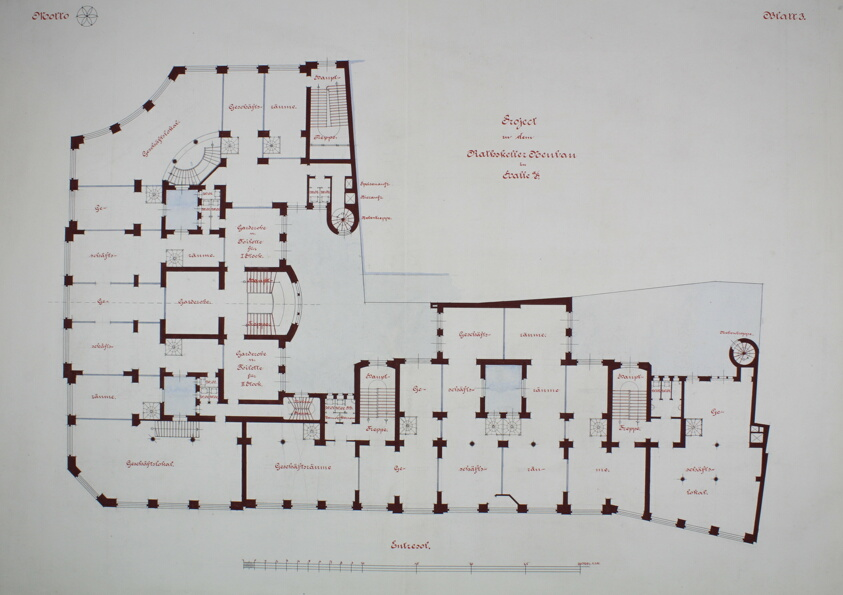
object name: Architectural Drawing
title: Rathskeller Neubau, Halle (Saale), Saxony-Anhalt, Germany, Mezzanine Plan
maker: Peter J. Weber; American, born Germany, 1863-1923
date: c. 1887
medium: Graphite, ink, watercolor, and tempera on paper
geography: Saxony-Anhalt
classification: design drawing; architectural drawing